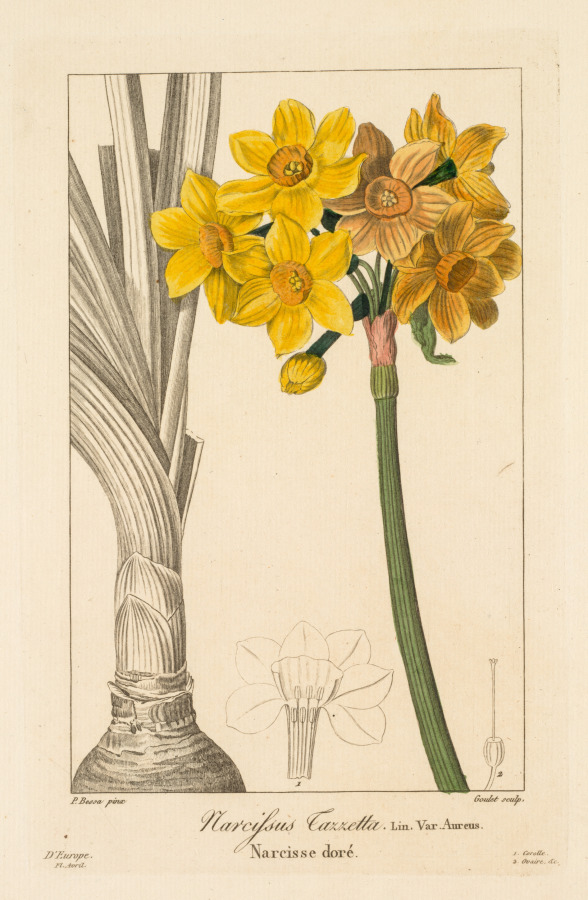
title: Flore des Jardiniers, Amateurs et Manufacturiers: Polyanthus or Cluster Narcissus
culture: France, 19th century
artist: Pancrace Bessa (French, 1772–1846)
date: 1836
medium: engraving, hand-colored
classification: Print